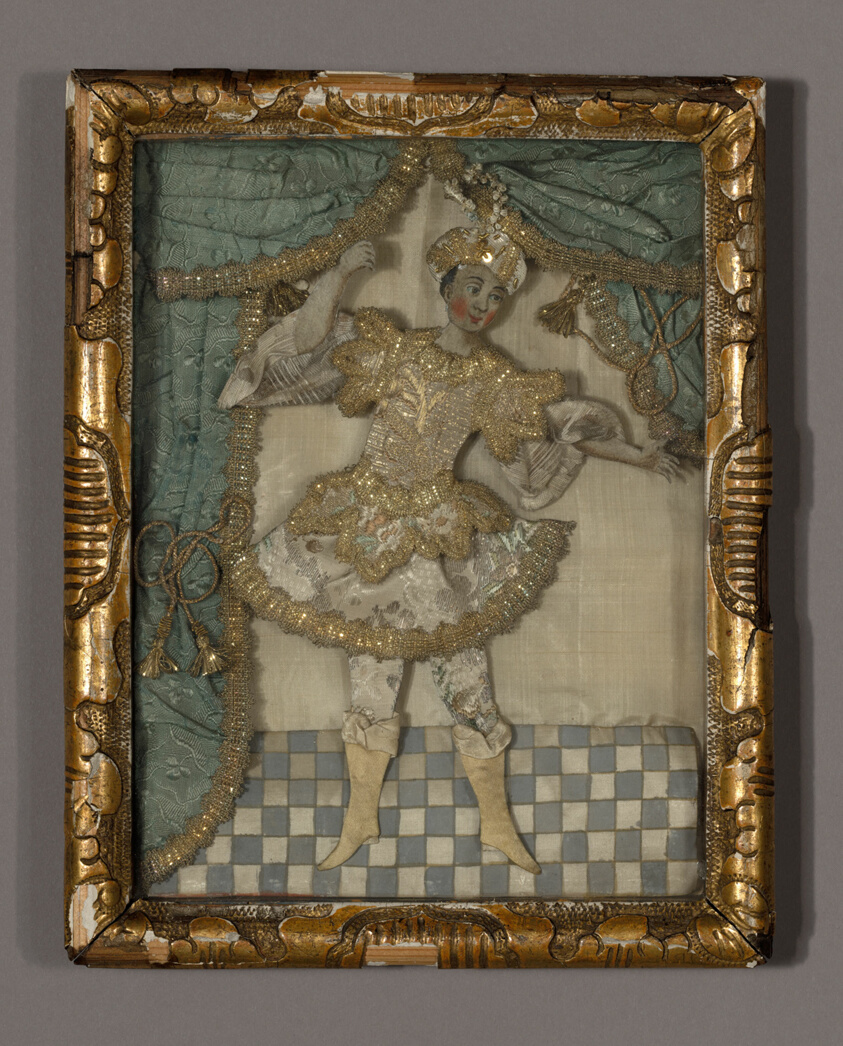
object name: Textile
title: Needlepoint Picture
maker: France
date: 19th century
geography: France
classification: textile; needlework (visual works)